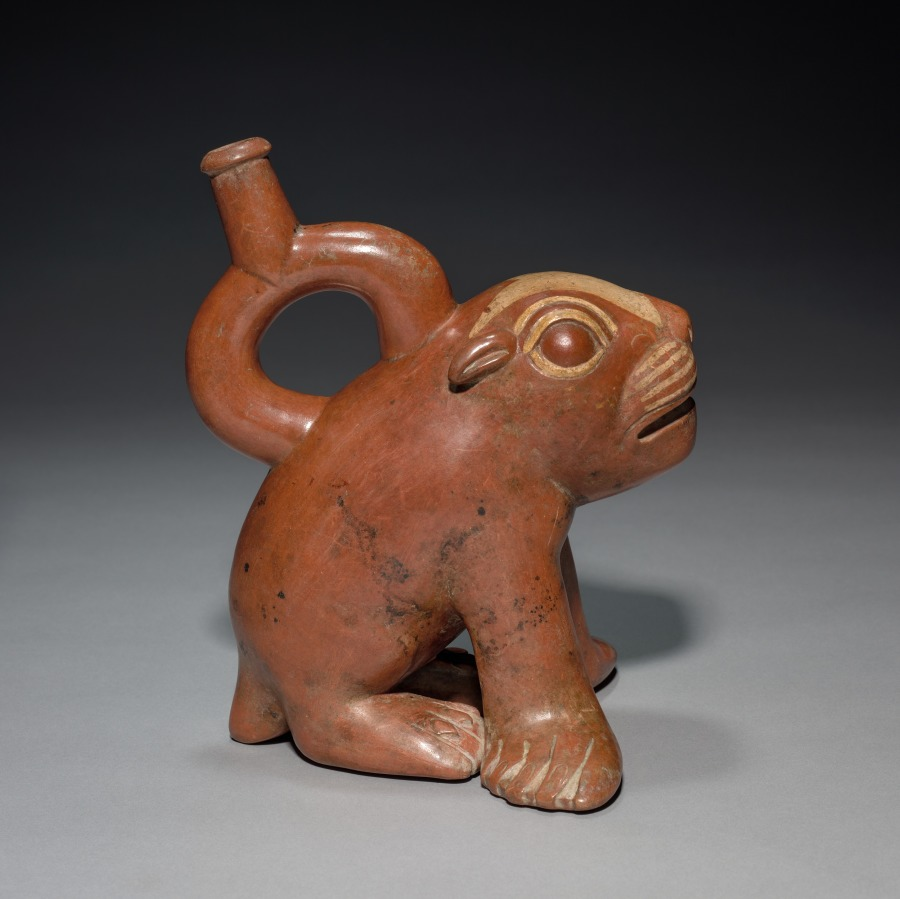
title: Sea Lion Pup Vessel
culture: Central Andes, North Coast, Moche people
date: 200–850 CE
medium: ceramic and slip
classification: Ceramic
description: Sea lions commonly appear in Moche art as effigy vessels, like this appealing pup, or in complex scenes that often show them as the targets of human hunters. They may have been prized in part for the beach pebbles found in their stomachs; modern Peruvian folk healers consider such pebbles to have powerful medicinal qualities. Also, colonial-period natives believed that sea lions carried the dead to off-shore islands, an idea that could date to Moche times.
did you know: Moche potters were skilled at producing charming images using only red and white slip.